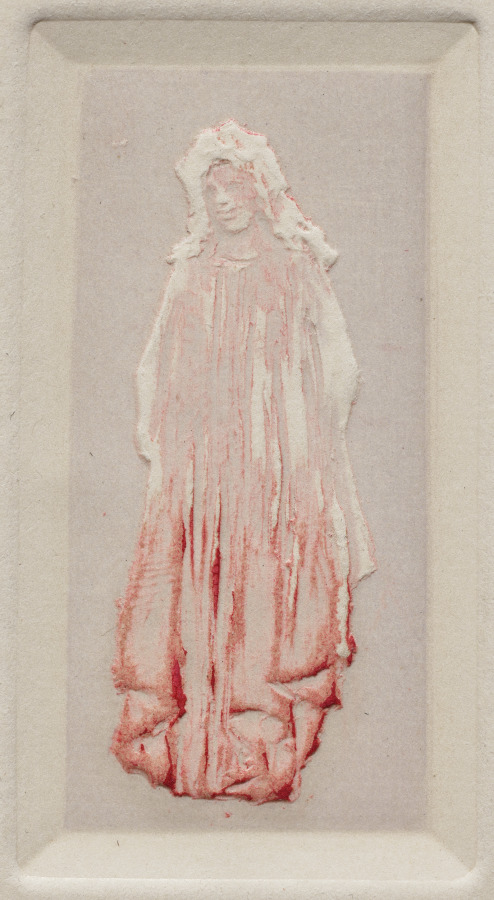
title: Small Standing Figure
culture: France, early 20th Century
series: La Loïe Fuller, by Roger Marx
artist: Pierre Roche (French, 1855–1922)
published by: Les Cents Bibliophiles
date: 1904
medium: gypsograph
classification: Bound Volume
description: Although best known as a sculptor, Roche was a versatile and prolific artist who worked in many mediums. Loïe Fuller, the pioneer of modern dance who took Paris by storm in 1892, was one of his favorite subjects. He portrayed her in clay, bronze, marble, plaster, and in a series of gypsographs that illustrated an essay by the art critic Roger Marx. The book was described as "a precious monument to Loïe Fuller."